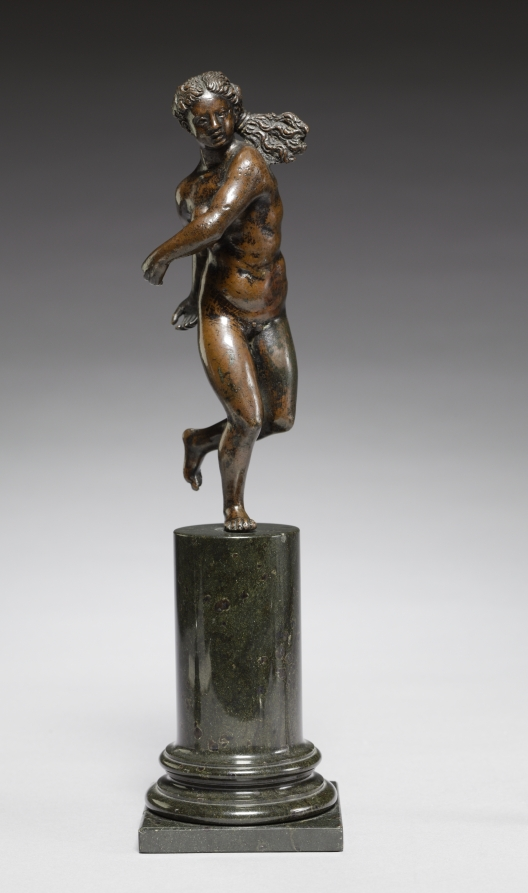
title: Thetis Running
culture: Italy, Ravenna, 16th century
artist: workshop of Severo da Ravenna (Italian, c.1496–c.1543)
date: c. 1527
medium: bronze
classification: Sculpture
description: The complex, corkscrew-like twist of the figure’s body around a central axis indicates that this work was meant to be seen and admired in the round. Producing a sculpture of a body in motion posed a challenge for Renaissance artists, and complex compositions like this were often adapted from prints and paintings. The pose of this bronze statuette may have been inspired by a print representing the Greek sea goddess Thetis. Thetis was courted by the gods Zeus (Jupiter) and Poseidon (Neptune), but was eventually married to the mortal Peleus; the Greek hero Achilles was their son. In the print, Thetis pours water from a jug held at her hip and her upraised foot rests on a large shell, both referencing her role as sea goddess. The statuette’s lack of identifying attributes encourages the viewer to focus instead on the figure’s graceful spiraling form, and the sculptor’s skill in creating a convincing sense of movement.